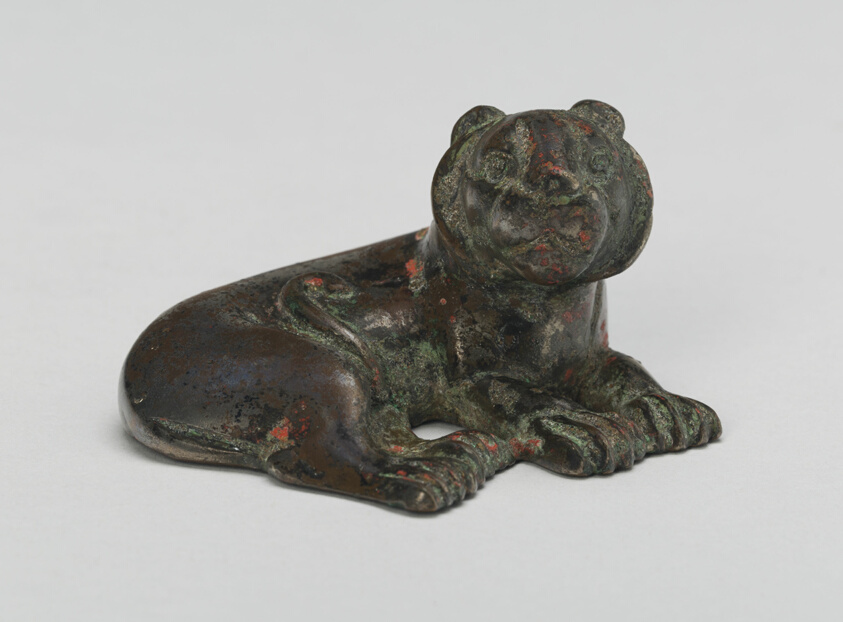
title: Reclining Tiger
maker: China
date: Western Han dynasty (206BCE–9CE)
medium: Bronze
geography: China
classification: bronze; metal; decorative object/ornament; asian art